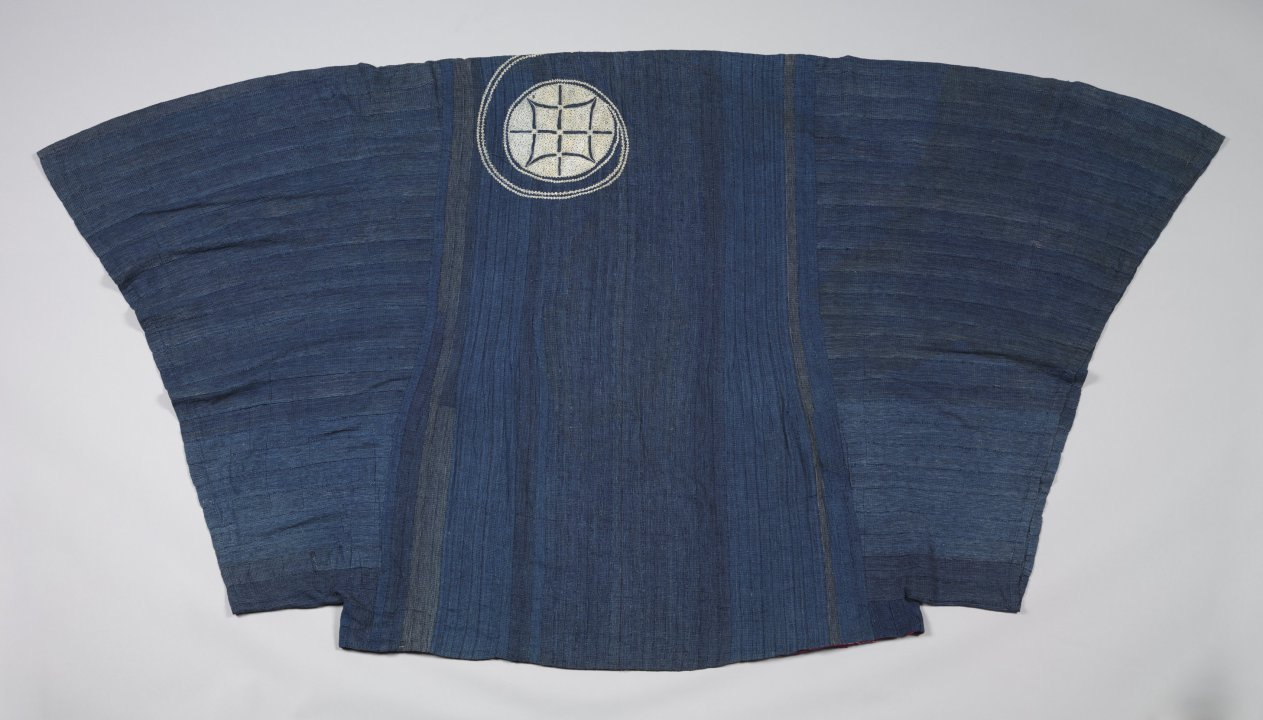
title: Prestige robe (riga)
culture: Africa, West Africa, Nigeria, probably Hausa-style or Nupe-style weavers and embroiders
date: late 1800s–by 1910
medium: Cotton, silk, and indigo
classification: Garment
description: Elite Nigerian men wore voluminous status garments variously called riga (Hausa), agbádá (Yorùbá), boubou (French), or mbubb (Wolof). Punctuated with white silk, this strip-woven riga’s inky blue was achieved by repeatedly dipping threads into indigo dye before weaving them. Embroiderers were often skilled Arabic calligraphers; the motifs here once had protective Islamic symbolism. The front pocket features the pointed “eight knives” (aska takwas) and a leaf (gambiya) associated with the Nupe peoples. At back, a spiral leads the wearer toward God. Magenta silk imported via trans-Saharan routes lines the hem. Rigan historically held transcultural appeal; today, they are pan-Nigerian male national dress.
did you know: Its owner's movements would have revealed a flash of magenta silk (an expensive trade good) along the hem of this riga, emphasizing his high status.